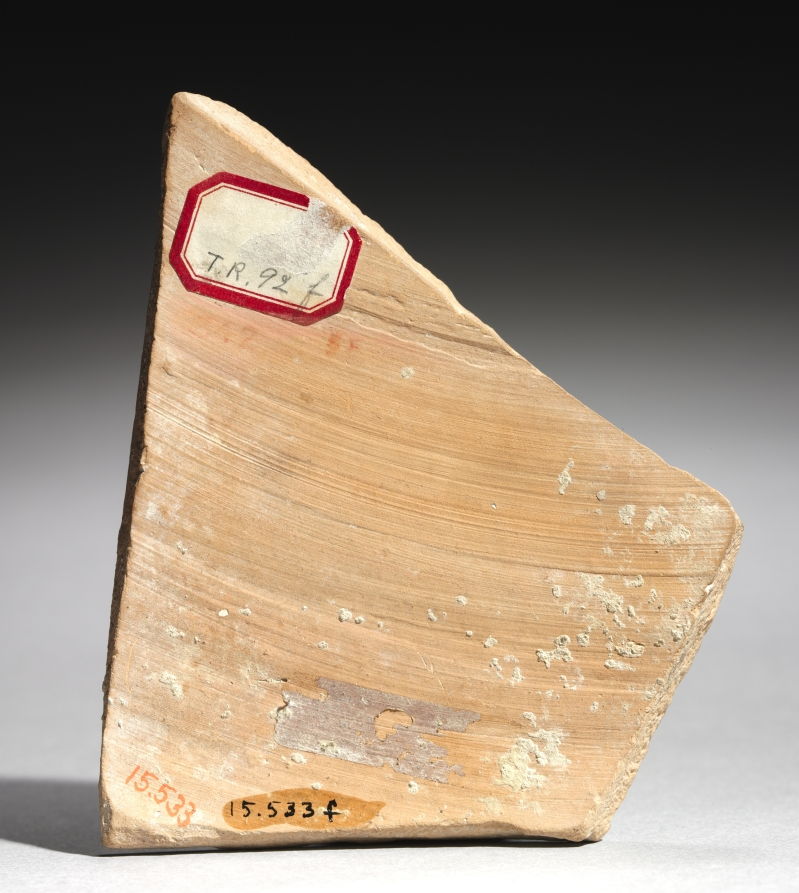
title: Fragment from Black-Figure Neck-Amphora of Panathenaic Shape (Storage Vessel): Apollo with Lyre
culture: Greek, Attic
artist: manner of Antimenes Painter (Greek, Attic, active c. 530–510 BCE)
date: c. 520 BCE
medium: ceramic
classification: Ceramic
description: With so little preserved, the precise subject once shown on this vase remains uncertain. Along with Apollo playing his lyre, parts of the mane and reins of a horse remain, suggesting a chariot procession—perhaps for the wedding of Peleus and Thetis, an event attended by the Olympian gods.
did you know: Although only two fragments survive from this vase, both show Apollo, here playing his lyre.